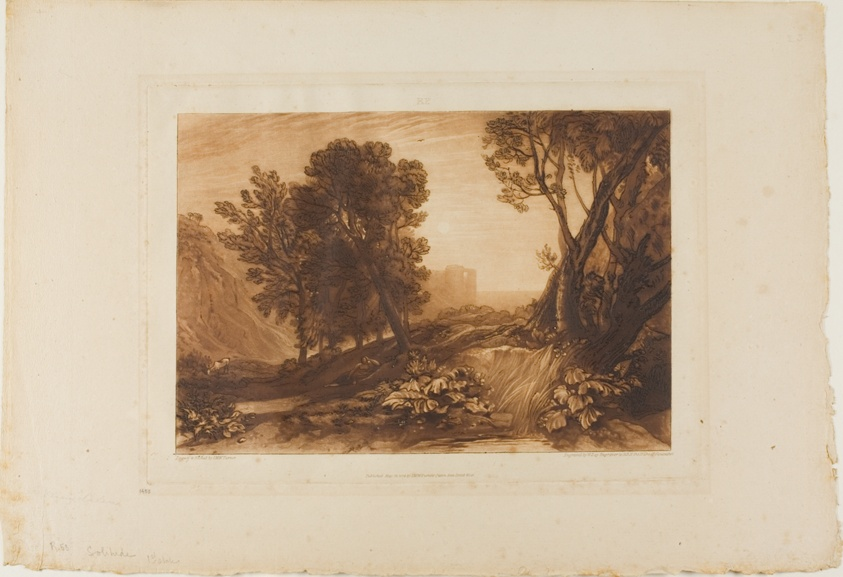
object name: Print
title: Solitude, plate 53 from Liber Studiorum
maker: Joseph Mallord William Turner (English, 1775-1851); Engraved by William Say (English, 1768-1834)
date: published May 12, 1814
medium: Etching and engraving on cream wove paper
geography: England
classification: etching; print; prints and drawing